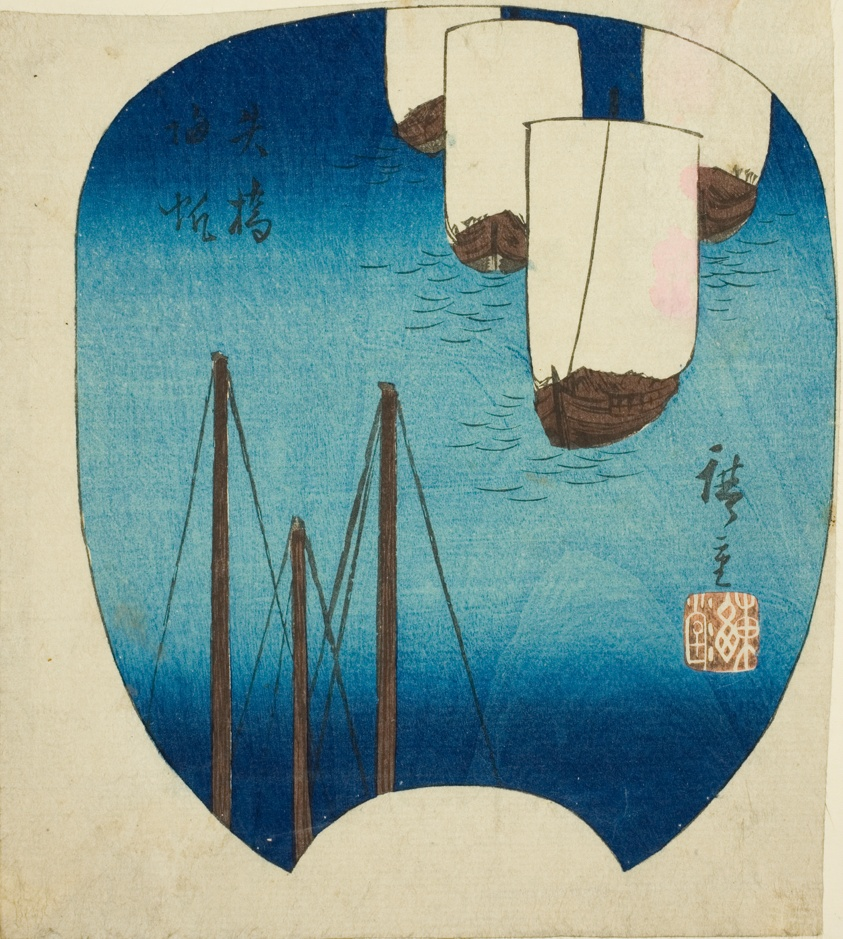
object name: Print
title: Returning Sails at Yabase (Yabase kihan), section of a sheet from the series "Eight Views of Omi (Omi hakkei)"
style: Japanese (culture or style)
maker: Utagawa Hiroshige 歌川 広重; Japanese, 1797-1858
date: c. 1847/52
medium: Color woodblock print; section of harimaze sheet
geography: Japan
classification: woodblock print; print; asian art